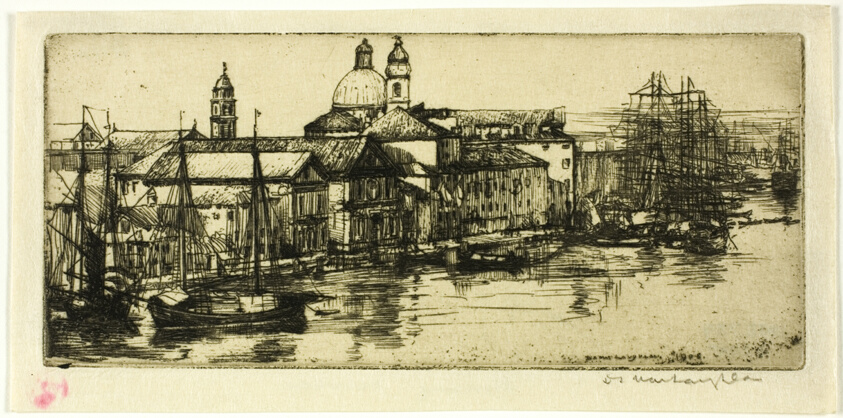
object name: Print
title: Morning, Venice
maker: Donald Shaw MacLaughlan (American, born Canada, 1876-1938)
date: 1908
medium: Etching in black on cream wove paper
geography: United States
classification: etching; print; prints and drawing